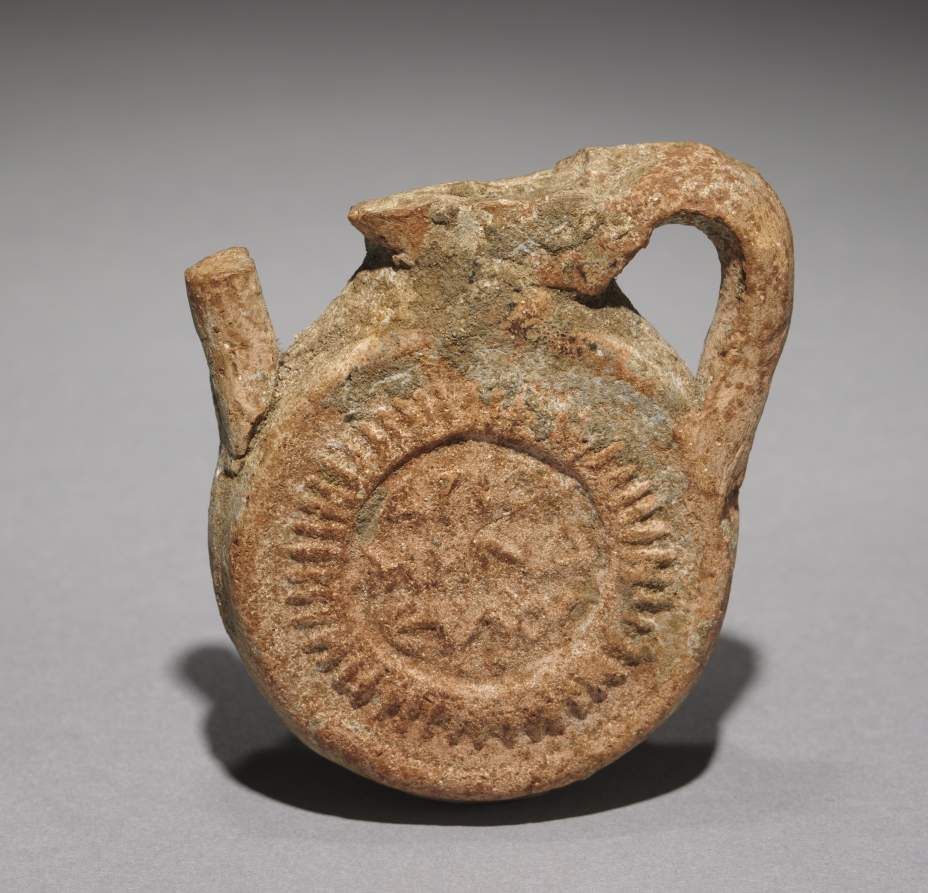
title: Pilgrim's Flask with Saint Menas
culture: Egypt, Coptic period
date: 400–600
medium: terracotta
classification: Ceramic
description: These flasks bear the image of Saint Menas, an early martyr of the Christian Church whose shrine was in the desert southwest of Alexandria in Egypt. These flasks were probably used by pilgrims to hold oil taken from the lamp that burned over this saint's tomb. Probably manufactured near the shrine, pilgrim's flasks often bear decorations hinting at their place of origin, as is the case here.